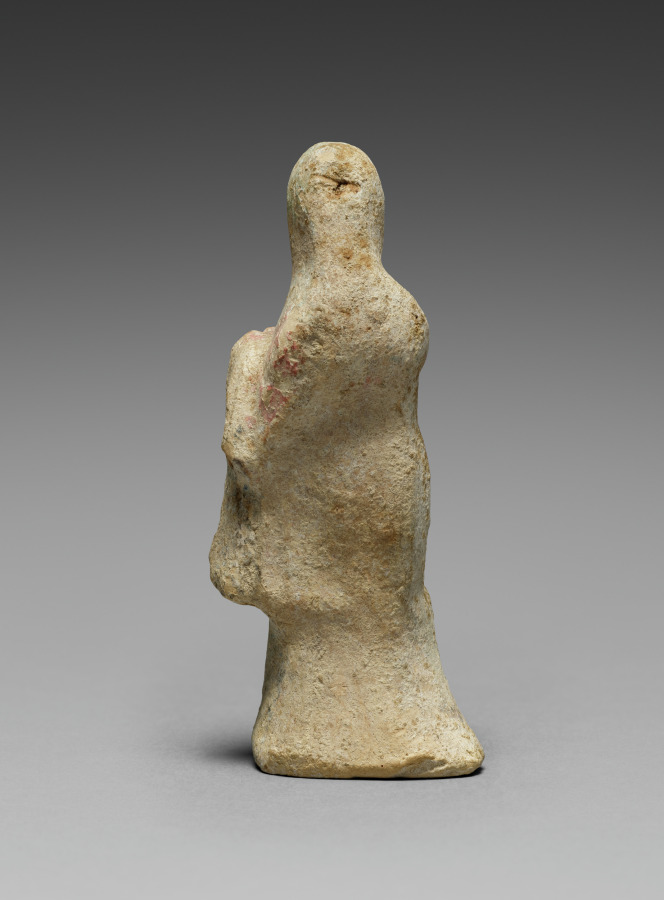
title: Figurine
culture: South Italy, Tarentum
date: 300–100 BCE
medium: terracotta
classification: Sculpture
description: Terracotta figurines like this one were popular throughout the ancient Mediterranean. This statuette takes the shape of a woman wearing a cloak or himation that twists around her form as she pulls it toward her left shoulder. Pigment is preserved in patches of red on the fabric over her arm. The figurine is mold-made, but only the front of the figure is modeled.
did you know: In ancient Greek art and literature, veiling the head or face was often a sign of αίδως (aidos), modesty or shame.